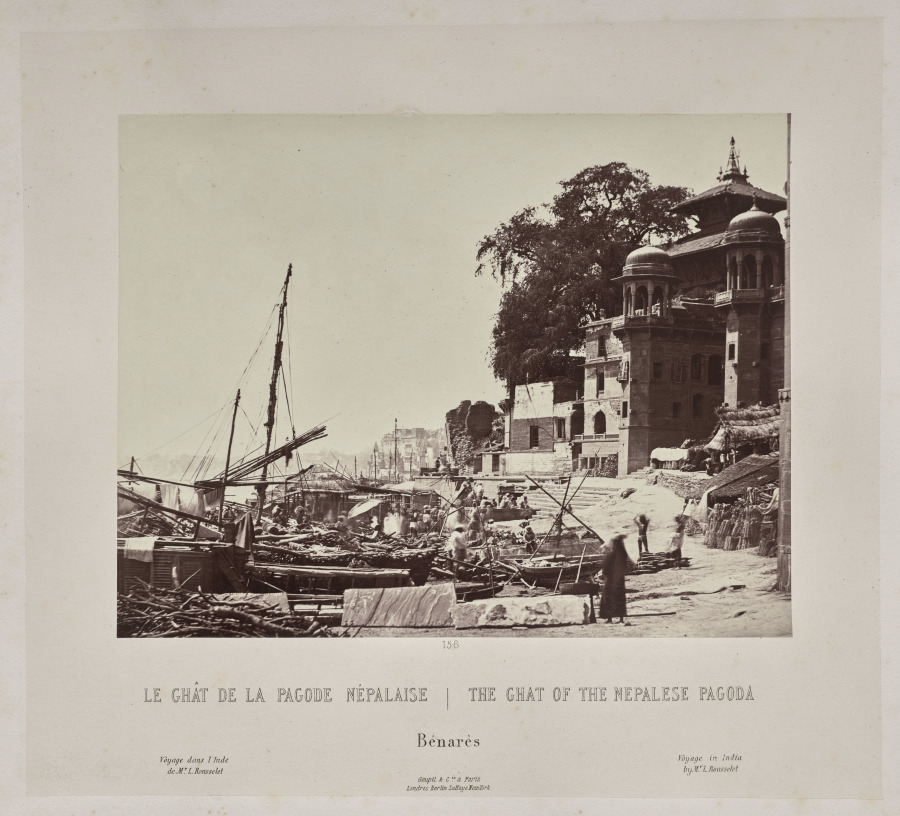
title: The Ghat of the Nepalese Pagoda, Bénarès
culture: France, 19th century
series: India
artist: Louis-Théophile Marie Rousselet (French, 1845–1929)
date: 1865–68, published 1869–70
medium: Albumen print from glass plate negative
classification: Photograph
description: Concerned that his drawings did not do justice to the splendor of India’s monuments, Rousselet learned photography in India that year, a remarkable accomplishment. He proved to be a talented photographer with a sophisticated sense of composition. The scenes in this volume sweep across sites of Sultanate, Rajput, and Mughal power in northern India, from the sacred Hindu city of Varanasi on the Ganges River to Alwar in Rajasthan. Also included are several scenes of industry and portraits of Indian rulers.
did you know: Louis Rousselet described himself as a “scientific traveler” when he went to India alone at age 18 in 1863 and stayed into 1868.